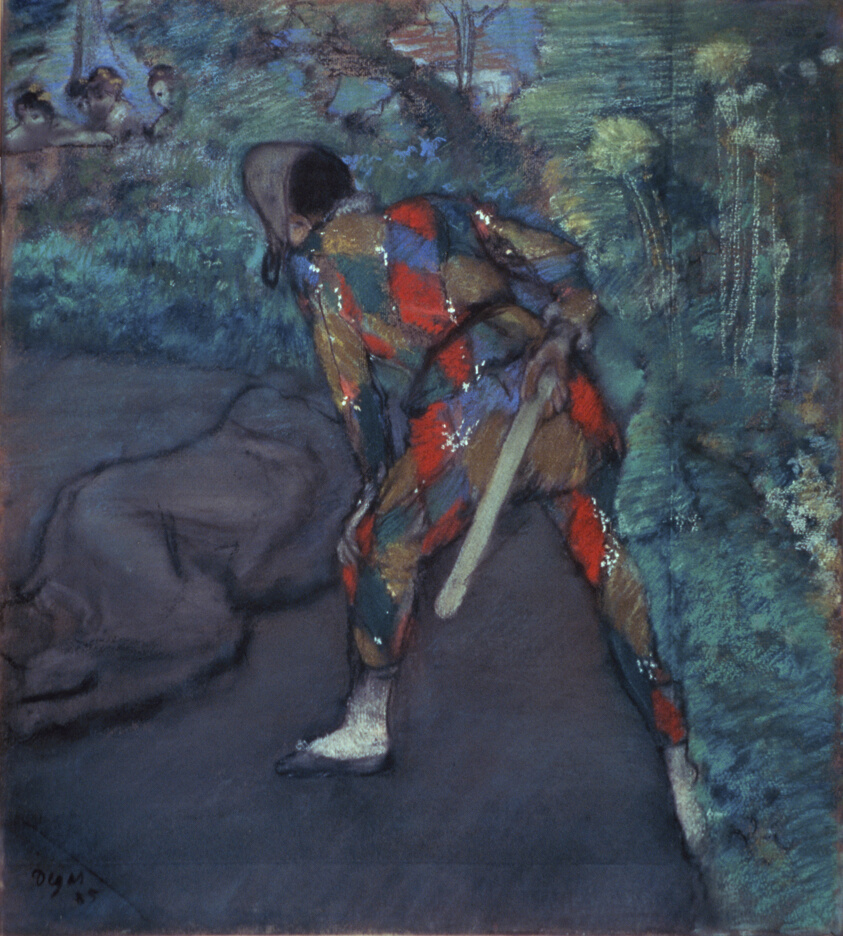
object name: Drawing and Watercolor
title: Harlequin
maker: Edgar Degas; French, 1834-1917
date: 1885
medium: Pastel on cream laid paper, pieced at bottom and right and laid down on board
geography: France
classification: pastel; drawings (visual works); prints and drawing; paper